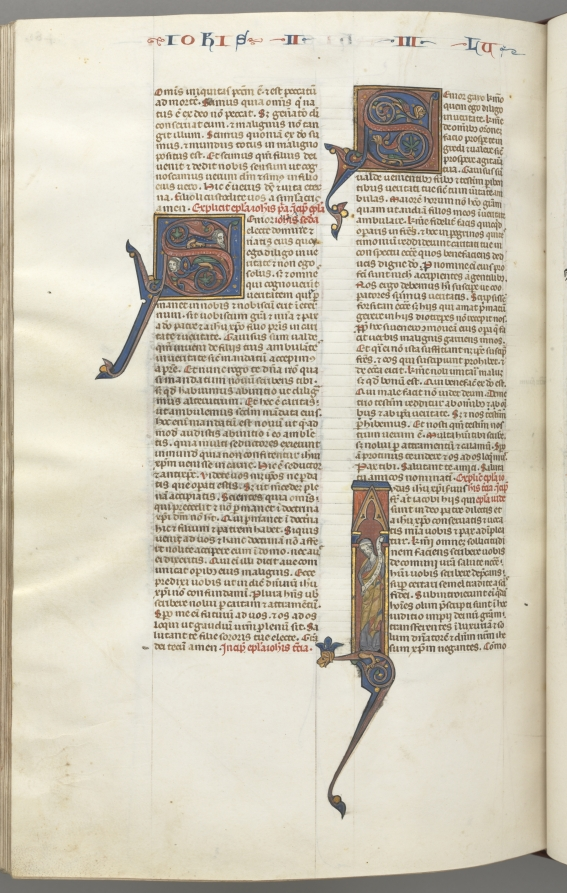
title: Fol. 481v, Jude, historiated initial I, Jude standing with a scroll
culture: Southern France, Toulouse(?), 13th century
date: c. 1275–1300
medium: ink, tempera, and gold on vellum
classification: Bound Volume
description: Biblical manuscripts were highly prized and important possessions of churches, monasteries, cathedral schools, and universities throughout medieval Europe. The biblical texts were known as the vulgate, the translations made by Saint Jerome in the fourth century from Hebrew and Greek into Latin, which became the definitive and official Latin version of the Roman Church. In the 13th century, the bible was, for the first time, produced as a single volume with an officially sanctioned sequence to its books and chapters as illustrated by this example. The very extensive decoration of this bible is arranged hierarchically to indicate the relative importance of the various texts so that full or almost full-page initials mark the openings of the first prologue, Genesis, and the first Gospel; historiated initials mark the beginning of each book and illuminated initials mark the Prologues.